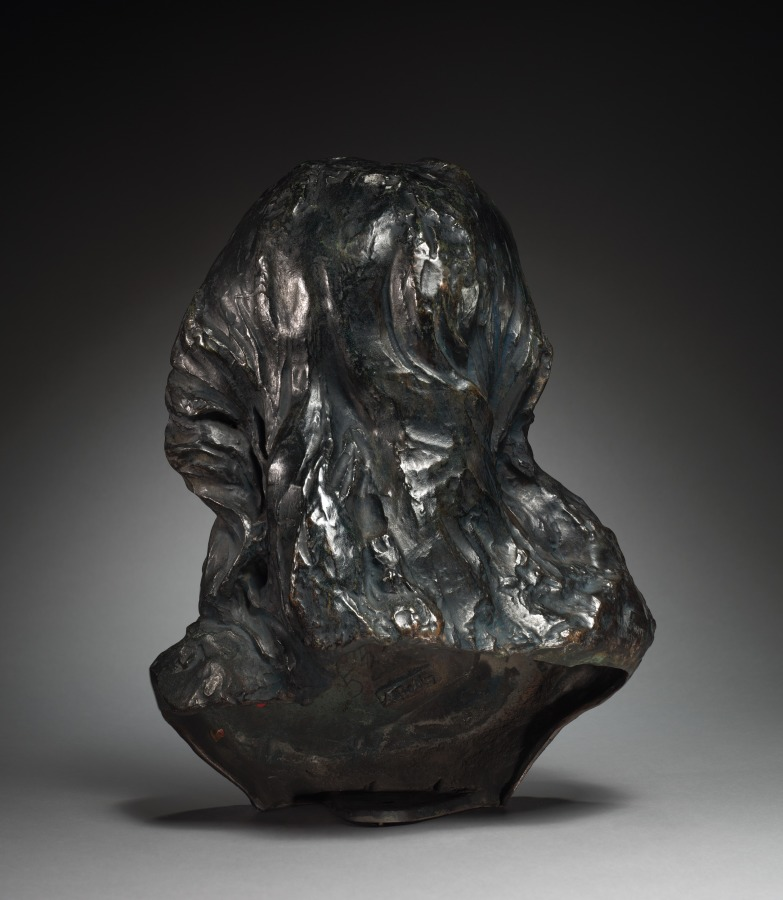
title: Mignon: Bust of Rose Beuret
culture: France, late 19th-early 20th century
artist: Auguste Rodin (French, 1840–1917)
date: c. 1867–1868 (original model)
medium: bronze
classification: Sculpture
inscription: Signed on shoulder to right: "A. Rodin"